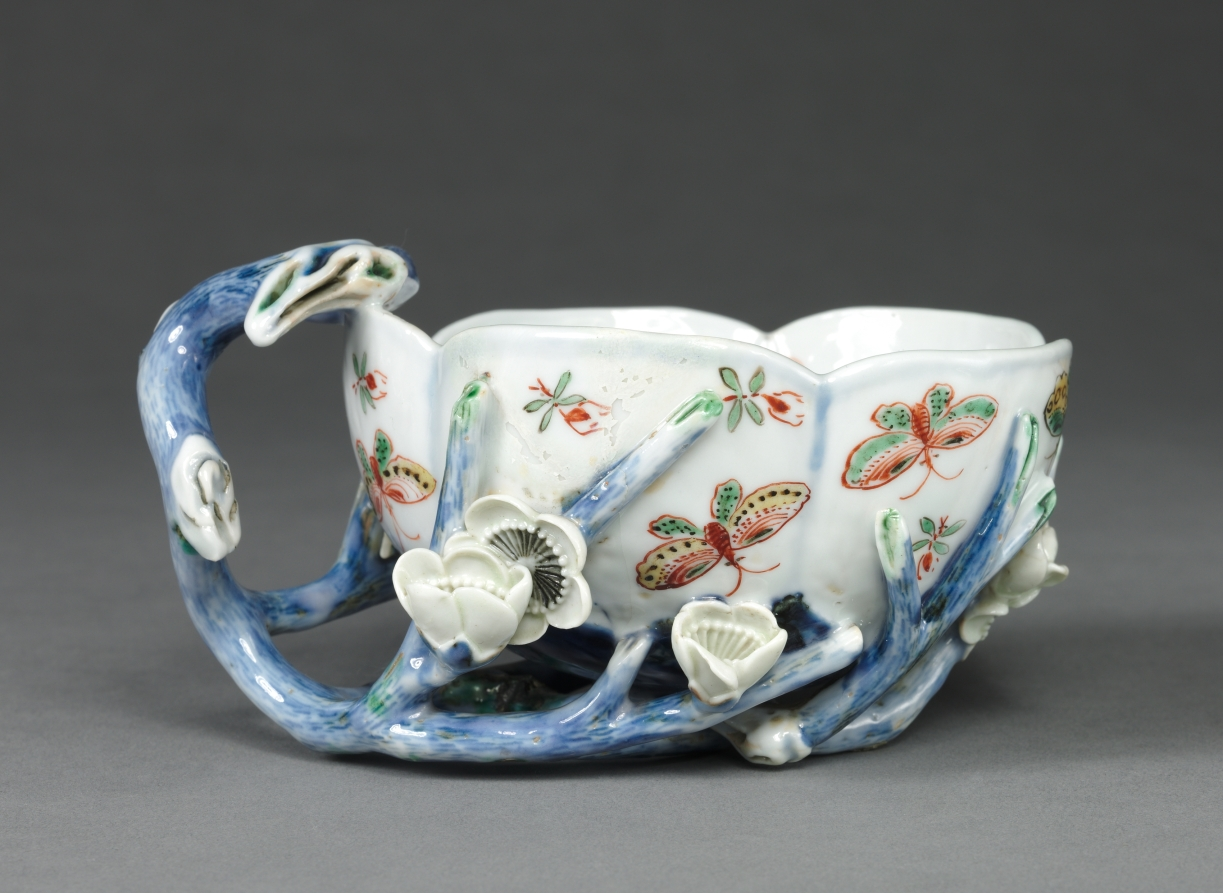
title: Plum Blossom Cup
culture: China, Jiangxi province, Jingdezhen kilns, "Transitional period", Ming dynasty (1368-1644), Tianqi reign (1621-1627)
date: 1621–27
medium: porcelain with underglaze blue and wucai (five color) overglaze enamel decoration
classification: Ceramic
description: This porcelain cup is considered to have been made in the "Transitional period," a term used to define the period between about 1620 and 1683 when official kilns in Jingdezhen were no longer under imperial supervision due to the transition from the Ming to the Qing dynasties.